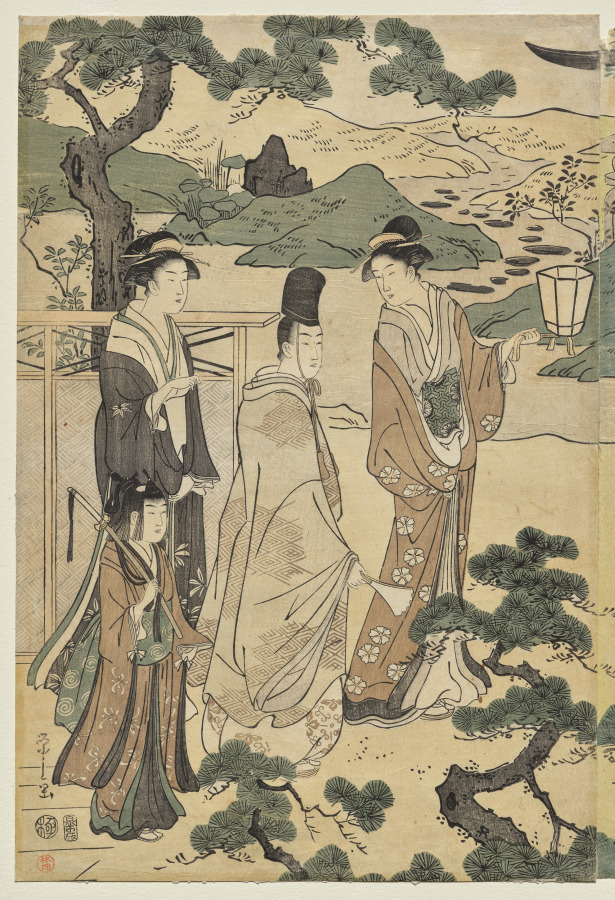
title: The Matsukaze Chapter of the Tale of Genji (from the series The Tale of Genji in Elegant Modern Dress)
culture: Japan, Edo period (1615–1868)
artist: Chōbunsai Eishi (Japanese, 1756–1829)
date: c. 1791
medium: color woodblock print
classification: Print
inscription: Signature: Eishi ga Publisher: Izumiya Ichibei (Senichi han) Seal: kiwame